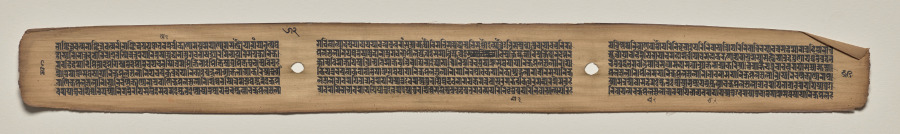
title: Text, folio 52 (verso), from a Manuscript of the Perfection of Wisdom in Eight Thousand Lines (Ashtasahasrika Prajnaparamita-sutra)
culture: Eastern India, Bihar, Vikramashila Monastery. Painting: Nepal, Kathmandu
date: Sunday, September 14, 1119 (year 239 of the Newar Samvat in the month of Ashvina)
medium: gum tempera and ink on palm leaves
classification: Painting